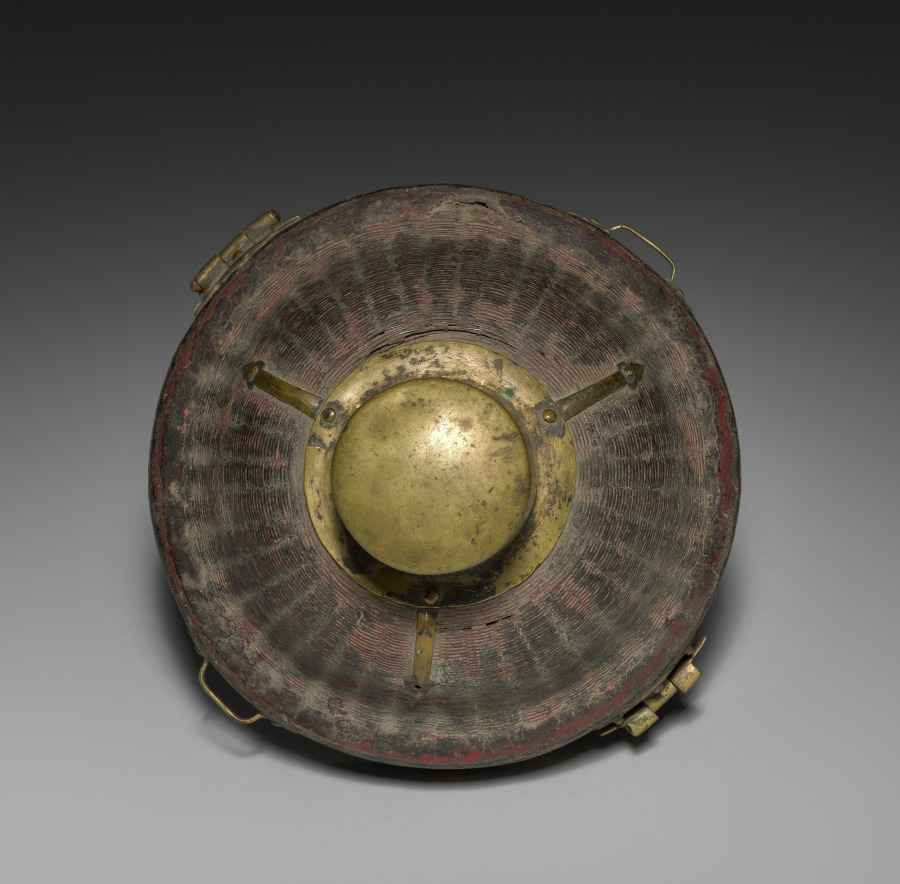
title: Stem Cup with Buddhist Emblems (case)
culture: China, Yuan dynasty (1271-1368)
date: 1300s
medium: wicker and wood with metal fittings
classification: Miscellaneous